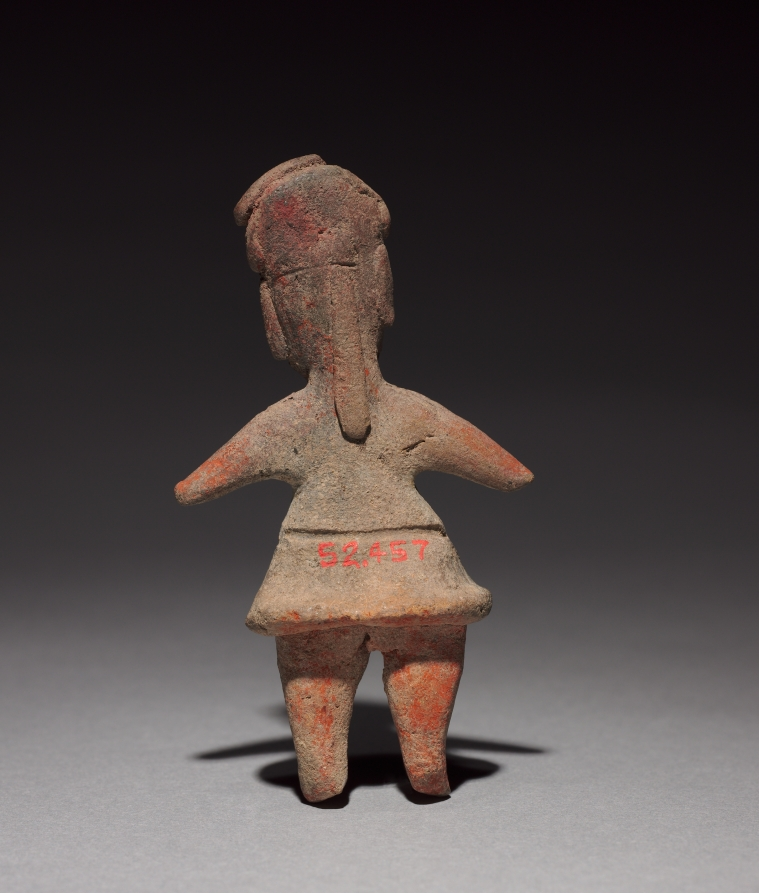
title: Archaic Figurine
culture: Mesoamerica, Central Mexico, Tlatilco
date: c. 1200–900 BCE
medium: earthenware with pigment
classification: Ceramic